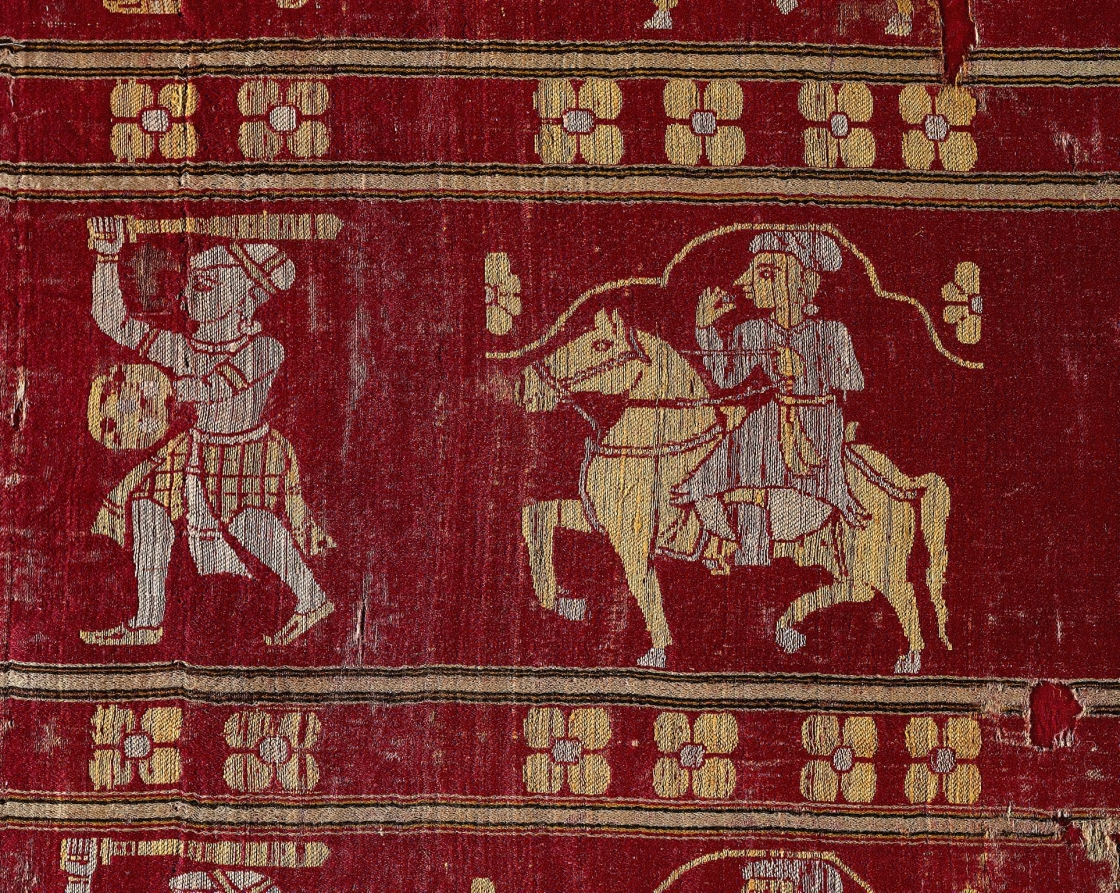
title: Tent Hanging (Part of a Larger Piece)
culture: India, Gujarat, Ahmadabad, 16th-early 17th century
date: 1560–1610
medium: Silk; lampas weave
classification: Textile